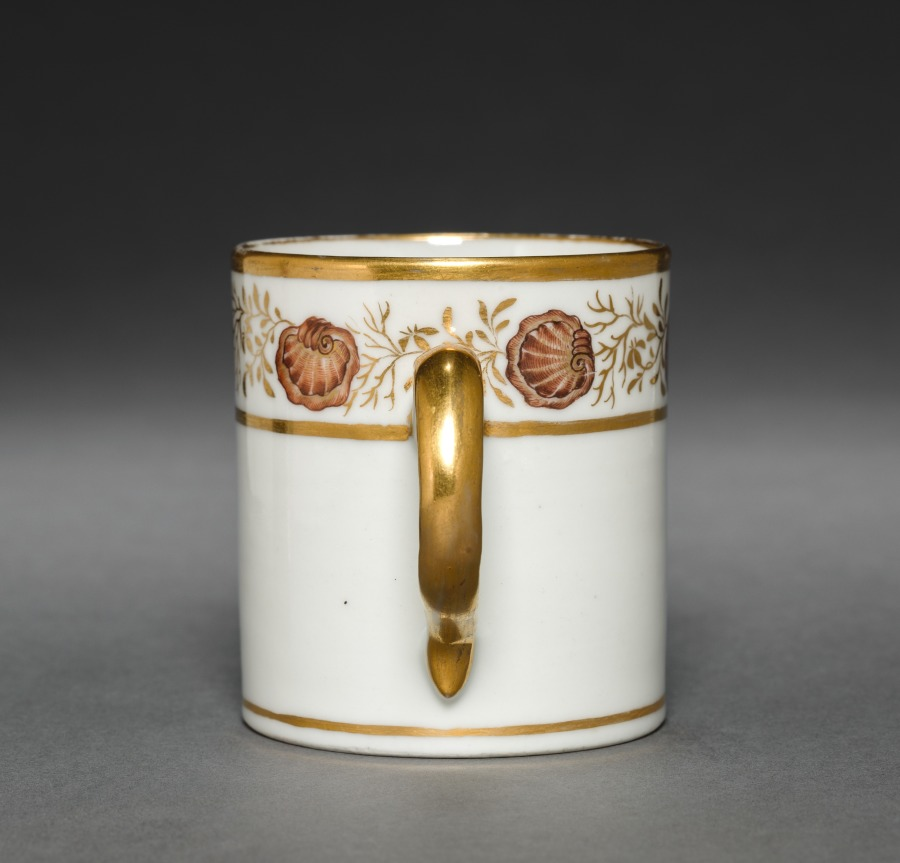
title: Cup from Oliver Wolcott, Jr. Tea Service (3 of 6)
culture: Chinese Export porcelain, late 18th-early 19th century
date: 1785–1805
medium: porcelain, sepia enamel, gold leaf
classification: Ceramic